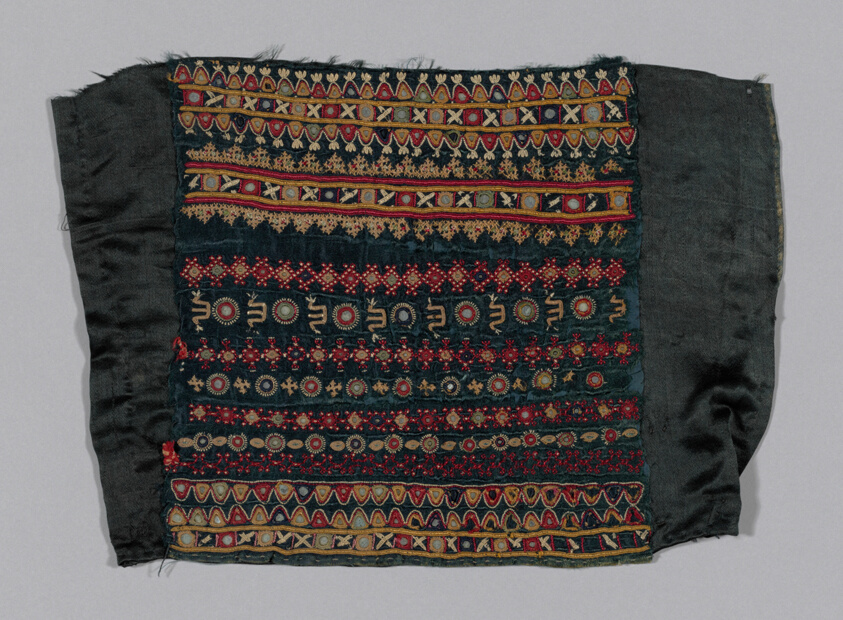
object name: Textile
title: Panel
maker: India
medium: Silk, warp-float faced 7:1 satin weave; embroidered with silk in back, chain, open chain, four-sided, Holbein, Maltese cross, Roumanian, and raised Roumanian stitches; embellished with pieces of mirror; some selvages present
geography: India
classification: textile; needlework (visual works)